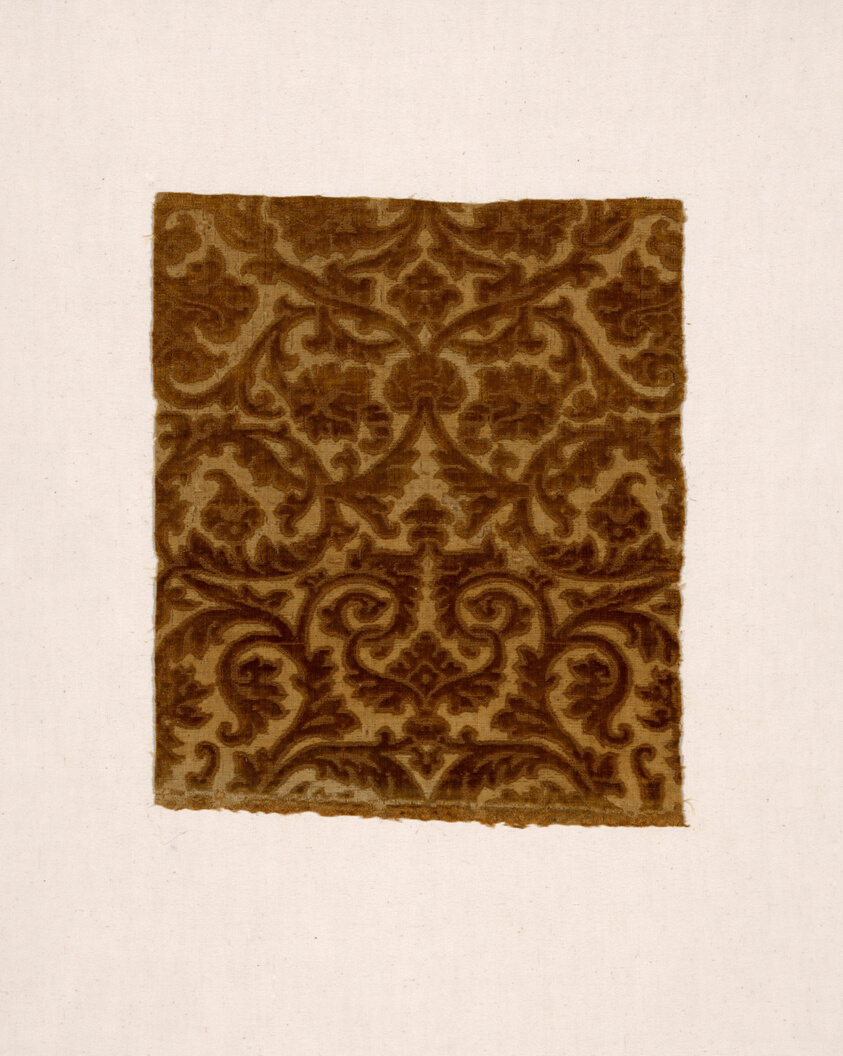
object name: Textile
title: Fragment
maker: Italy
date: 1575/1600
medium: Silk, warp-float faced 3:1 broken warp chevron twill weave with gilt-metal-strip supplementary facing wefts and supplementary pile warps forming cut and uncut voided velvet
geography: Italy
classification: textile; weaving - velvet